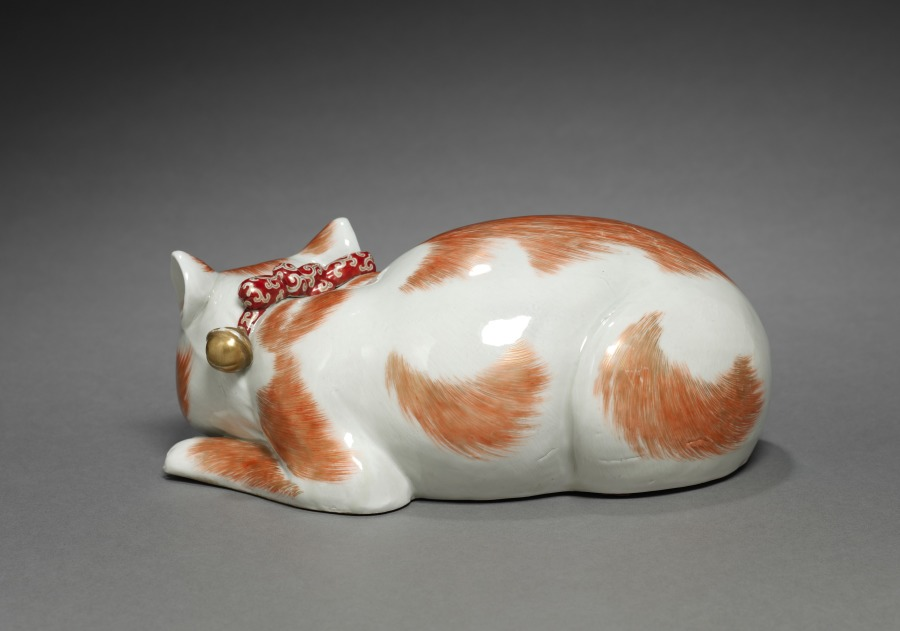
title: Sleeping Cat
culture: Japan, Edo period (1615–1868)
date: early to mid-1800s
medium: Porcelain with overglaze color enamel and gold (Hizen ware)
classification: Sculpture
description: Models of sleeping cats with collars and bells like this one were popular as decorative objects, and some of them also served as incense burners or hand warmers. This cat was just for display and has very carefully incised lines in the surface of the clay body, as well as thin strokes of orange and gold over the glaze to create the sense of soft fur.